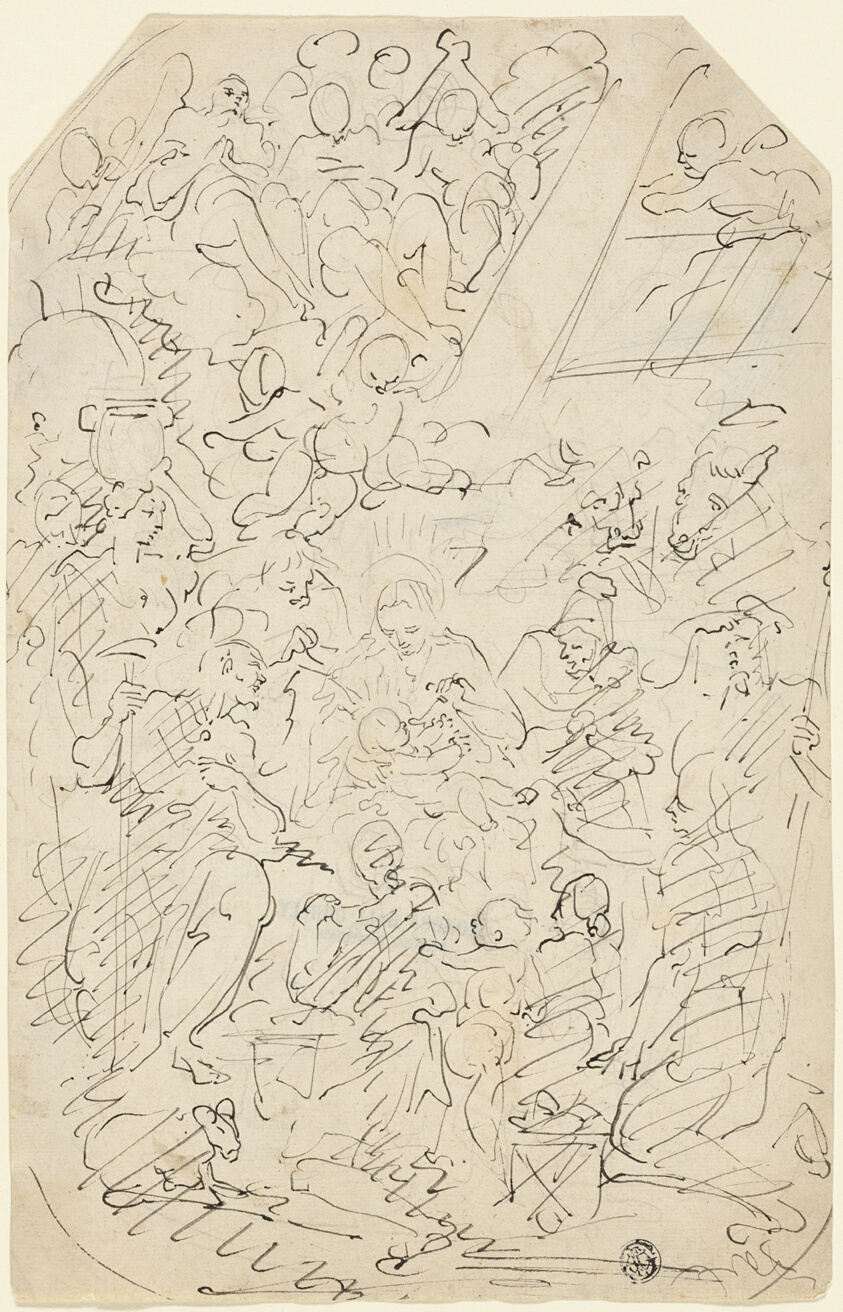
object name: Drawing and Watercolor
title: Adoration of the Shepherds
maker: François Boitard (French, c.1670–c.1715)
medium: Pen and black ink on buff laid paper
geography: France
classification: pen and ink drawings; drawings (visual works); prints and drawing